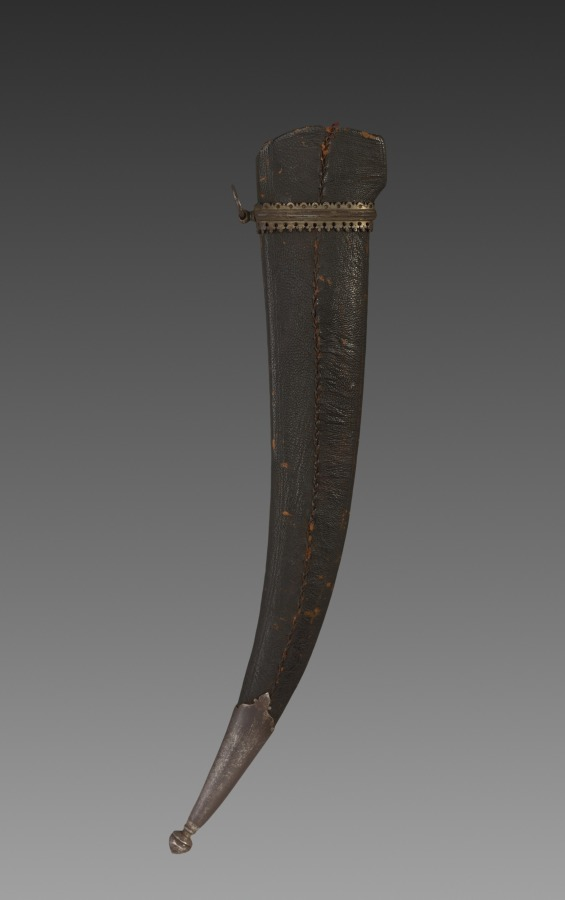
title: Scabbard for Knife with Jade Handle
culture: East India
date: c. 1750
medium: leather with silver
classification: Arms and Armor